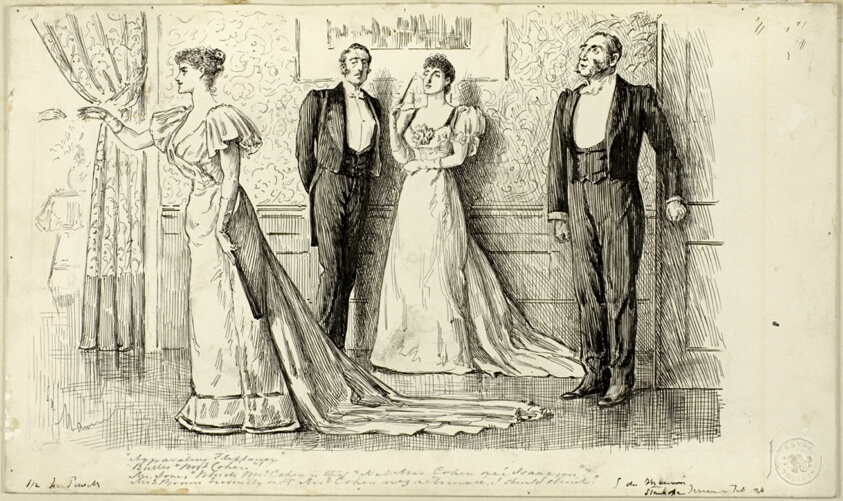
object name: Drawing and Watercolor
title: Aggravating Flippancy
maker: George Louis Pamella Busson Dumaurier; French, 1834-1896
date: 1894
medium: Pen and black ink on ivory wove card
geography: France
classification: pen and ink drawings; drawings (visual works); prints and drawing